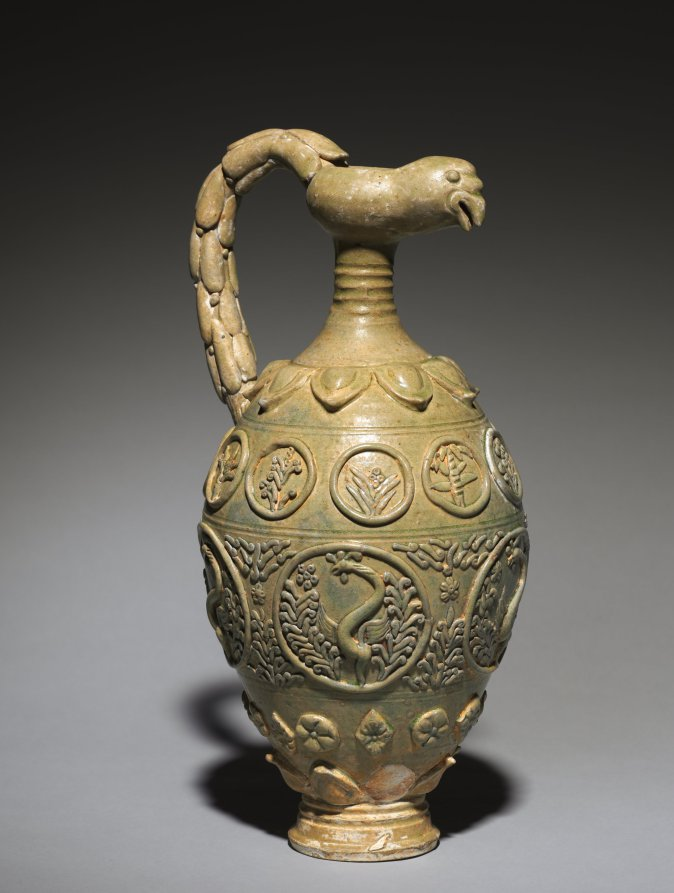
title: Bird-Headed Ewer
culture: China, probably Henan province, Tang dynasty (618-907)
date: 600s–700s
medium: green-glazed stoneware with modeled, molded, and applied decoration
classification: Ceramic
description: With a lobed body, a bird-shaped head, and a birdfeather loop handle, this ewer is derived from West and Central Asian metalwork: Tang potters adopted foreign shapes (bird-headed ewer and amphora) and foreign motifs (floral medallions, vines, palmette, and roundel designs) with great freedom. The artistic expressions bespoke the confidence and spirit of the period. This work is a representation of northern celadon, although it is commonly believed that the northern kilns specialized in white wares and the southern kilns in green wares (notably, Yue celadon). It continues the tradition of celadon production in the north during the late Northern Dynasties period in the 500s.